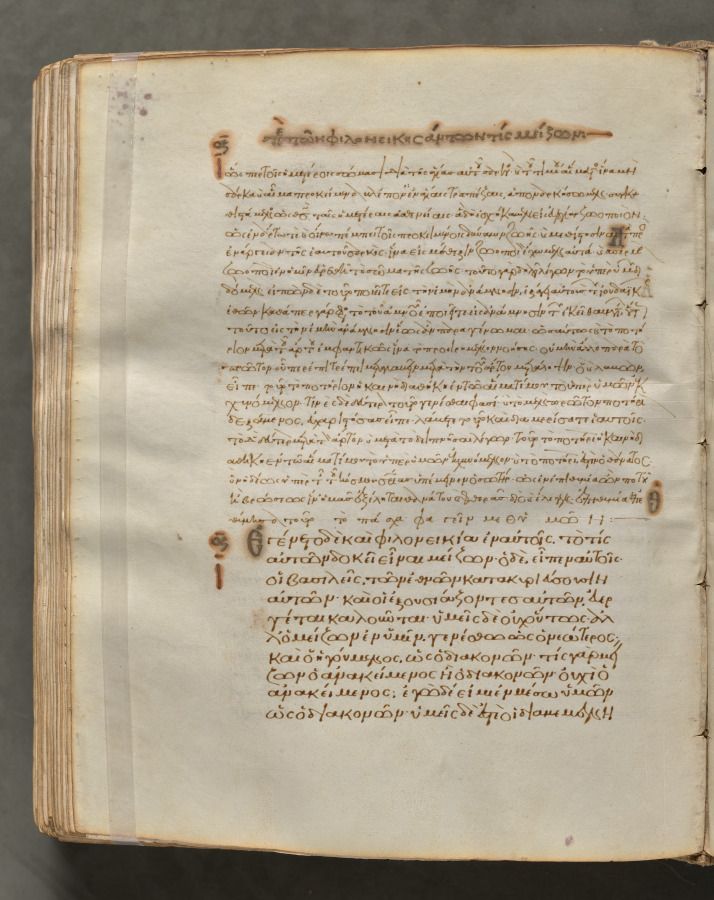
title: Text, folio 308 (verso), from a Gospel Book with Commentaries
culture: Byzantium, Constantinople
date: c. 1000–1100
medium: ink, tempera, and gold on vellum; leather binding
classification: Bound Volume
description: Each of the four gospels in this book opens on a page with brilliantly illuminated borders depicting the author of the text as well as birds—principally peacocks, symbols of the immortality of the soul—and fountains, representing the fountain of life and the salvation of the soul. This volume consists of 428 leaves with texts in Greek. Its level of sophistication suggests that it was probably written and decorated in a monastery in Constantinople.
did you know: Gospel books were carried in procession through Byzantine churches.